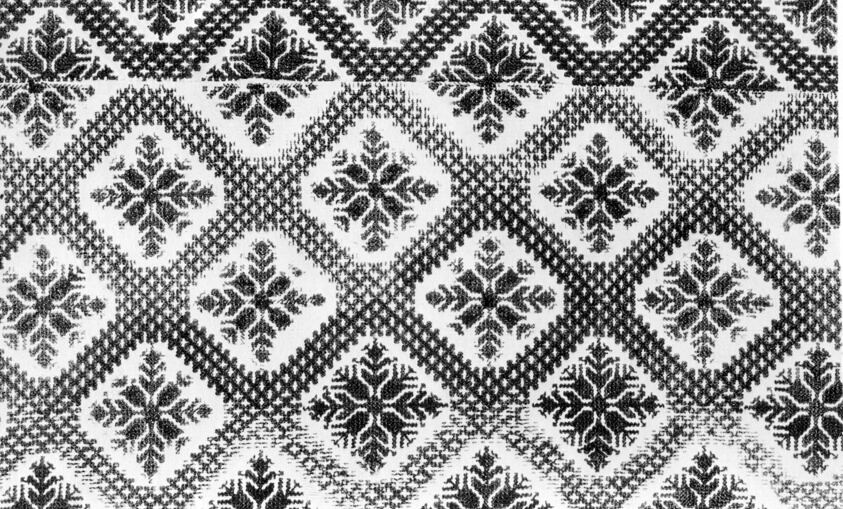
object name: Textile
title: Fragment (Mattress Cover)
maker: Morocco, Fès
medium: Silk embroidery on plain cream-colored cotton cloth. Stitch: Holbein stitch over three threads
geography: Morocco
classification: textile; weaving; needlework (visual works)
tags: morocco